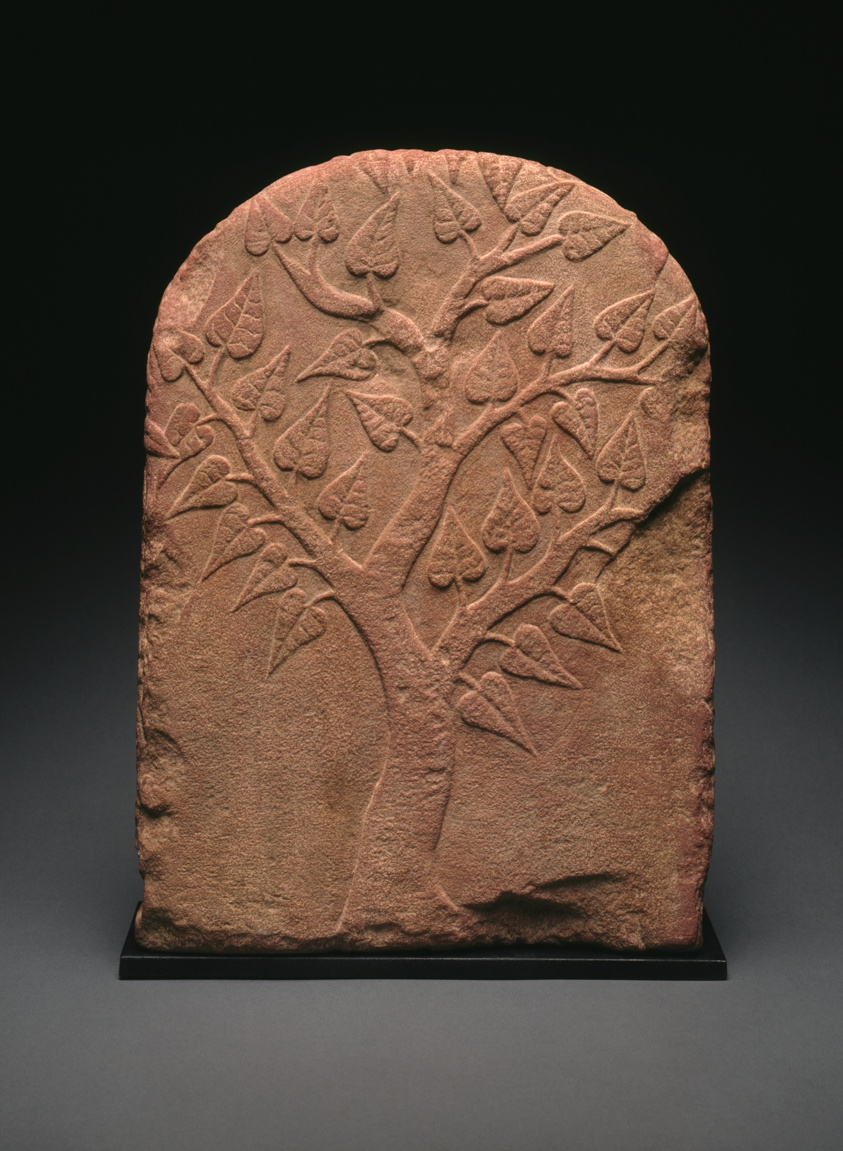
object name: Sculpture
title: Buddha Shakyamuni with Attendants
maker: India; Uttar Pradesh, Mathura region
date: Kushan period, 2nd century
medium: Sandstone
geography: Mathura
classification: sandstone; stone; sculpture; asian art